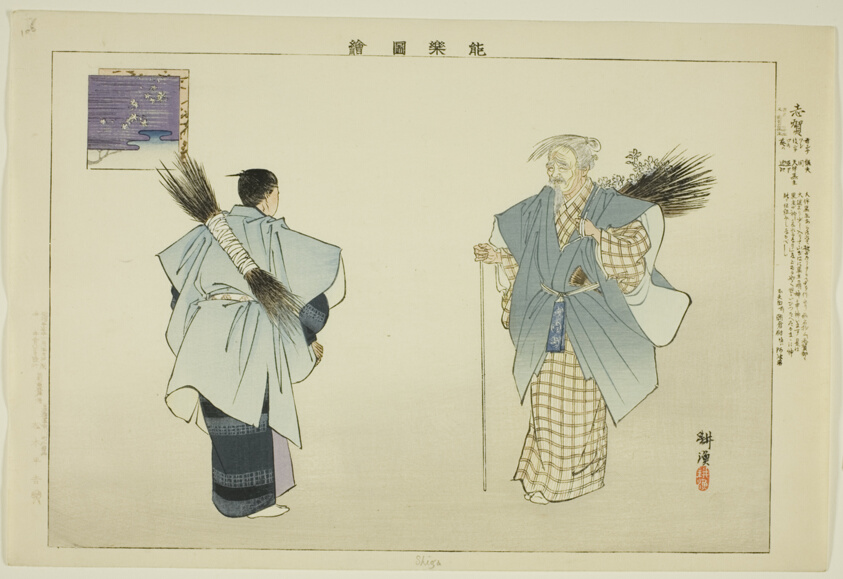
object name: Print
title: Shiga, from the series "Pictures of No Performances (Nogaku Zue)"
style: Japanese (culture or style)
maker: Tsukioka Kogyo; Japanese, 1869-1927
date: 1898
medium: Color woodblock print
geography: Japan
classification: woodblock print; print; asian art